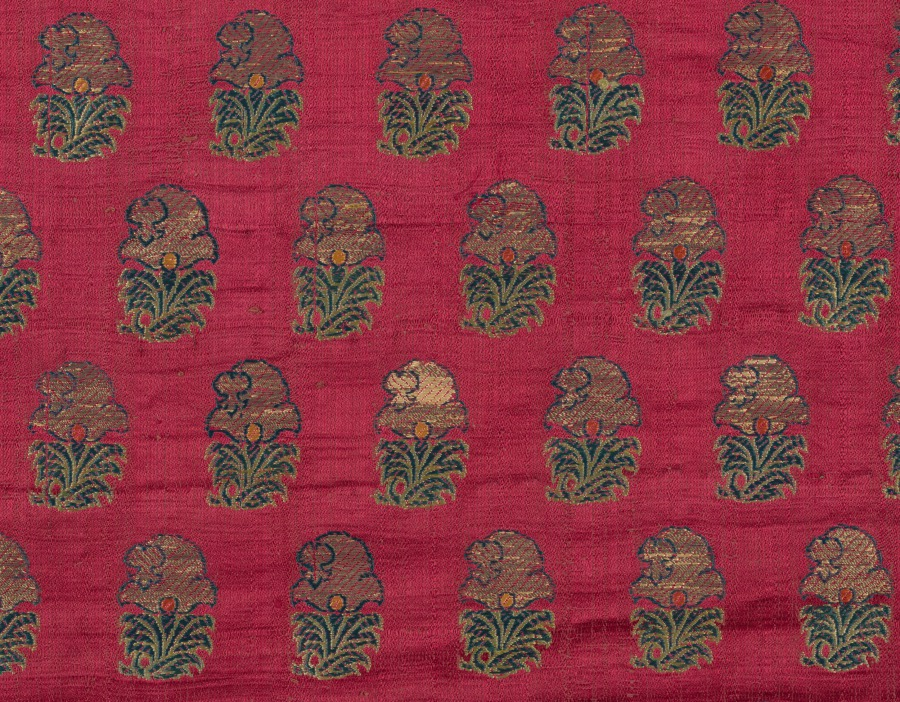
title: Fragment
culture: India, Warangal or Gulbarga, 18th or 19th century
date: 1700s or 1800s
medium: brocade, "himru"; cotton and silk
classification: Textile